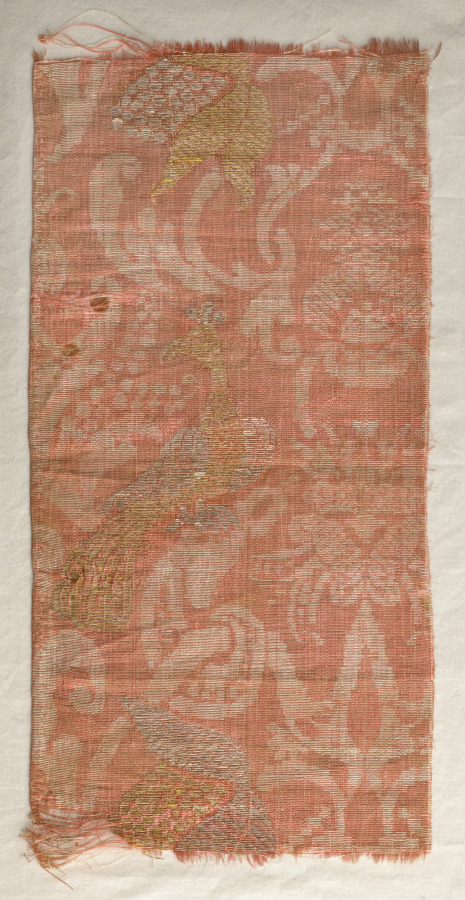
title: Brocade Textile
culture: Italy, 17th century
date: 1600s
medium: brocade; silk and metal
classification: Textile